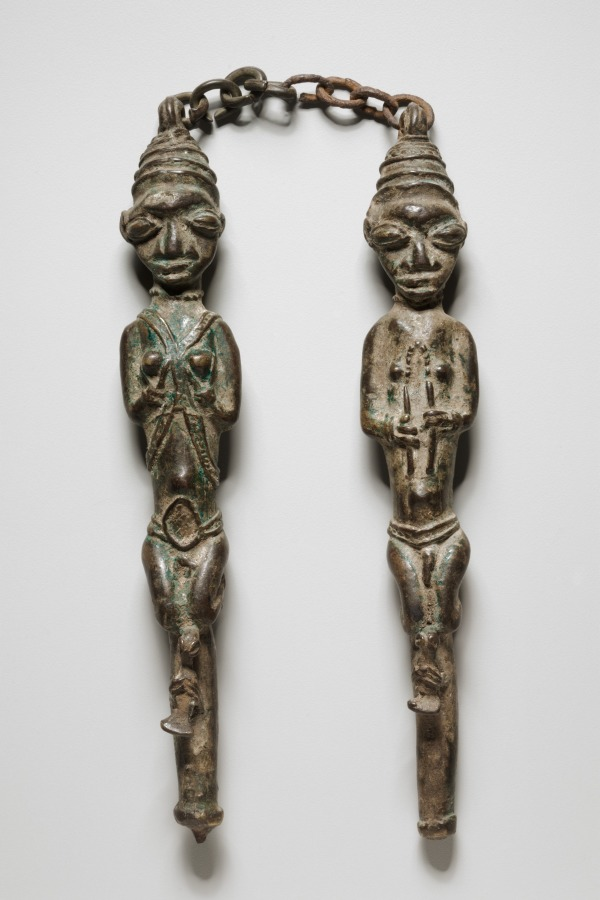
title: Pair of Ritual Staffs (ẹdan Ògbóni)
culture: Africa, West Africa, Nigeria, Yorùbá-style maker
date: 1800s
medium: Copper alloy and iron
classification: Sculpture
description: The chain connecting these two figures allows them to be worn in public by a member of the Ògbóni or Òṣùgbó association as authority emblems. The male on the right gives the association’s typical salute by clasping his left fist on the right one, while the female on the left holds her breasts as a sign of welcome and generosity. The use of copper alloy and iron expresses Ògbóni/Òṣùgbó's concerns with longevity and durability. Long iron spikes would have originally protruded from each figure's base.